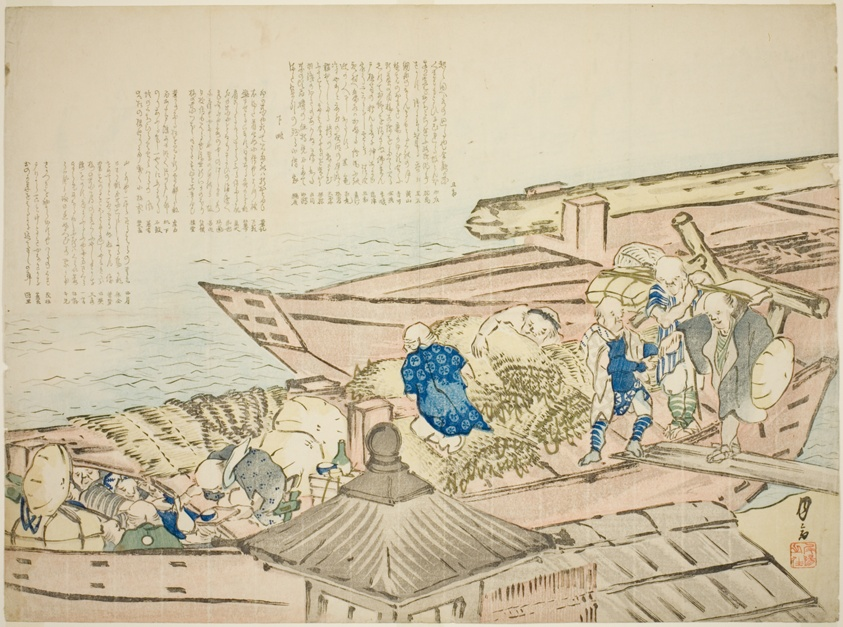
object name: Print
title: Docked boats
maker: Numata Gessai (Japanese, 1787-1864)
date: c.1831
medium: Color woodblock print; surimono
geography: Japan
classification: print; asian art